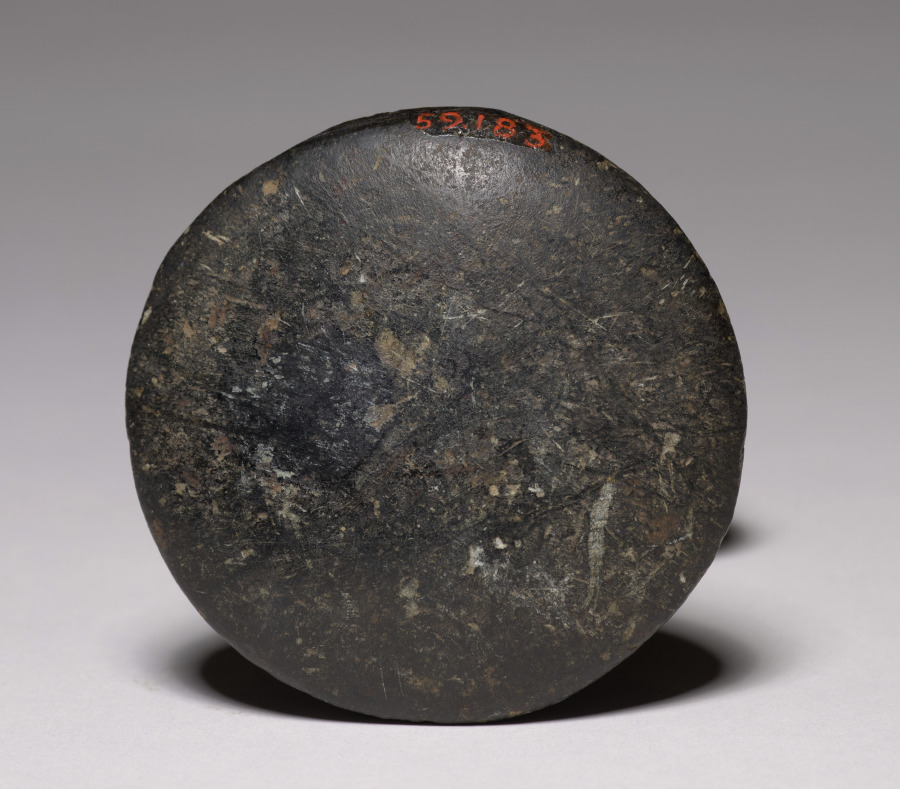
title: Pestle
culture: West Indies, Arawak (?), 15th century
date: 1400s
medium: stone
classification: Sculpture